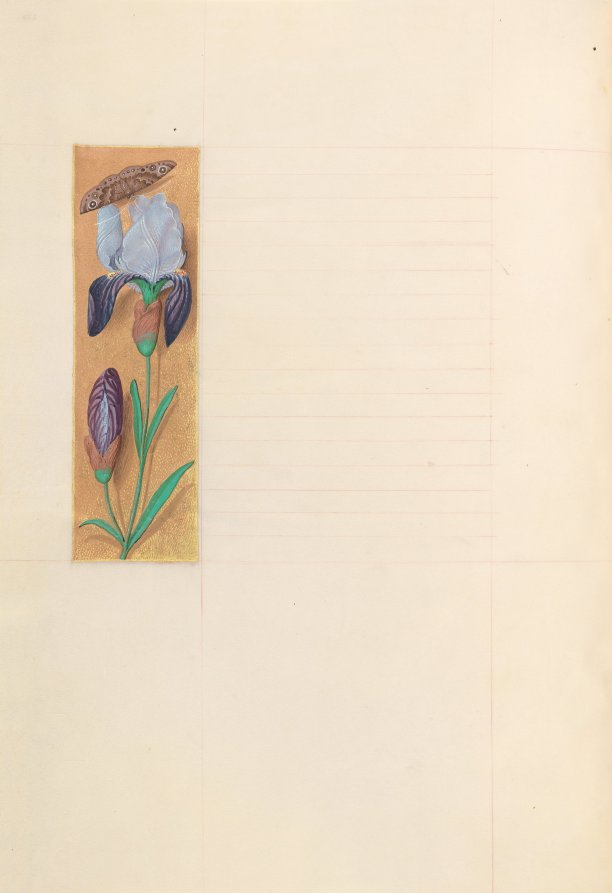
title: Hours of Queen Isabella the Catholic, Queen of Spain: Fol. 277v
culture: Flanders, Ghent and Bruges, late 15th century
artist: Master of the First Prayerbook of Maximillian (Flemish, c. 1444–1519)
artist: and Associates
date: c. 1500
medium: ink, tempera, and gold on vellum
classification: Bound Volume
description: This manuscript was illuminated by a circle of at least five highly organized manuscript painters active in the Flemish cities of Ghent and Bruges. The principal illuminator was Alexander Bening, who painted the majority of the book's miniatures. Manuscripts produced by this circle of artists are renowned for the decoration of their borders, which typically feature a rich variety of realistically-painted flowers, birds, and butterflies. This prayer book, called a book of hours, was intended not for a cleric, but for the private devotions of a lay person-in this case, Isabella the Catholic, Queen of Spain (1451-1504). Isabella's coat of arms embellishes the book's frontispiece. It is unlikely that the book was commissioned by the Queen herself; rather, she probably received it as a diplomatic gift from someone courting her patronage, perhaps Cardinal Francisco Jimenez de Cisneros. A Franciscan friar, Jimenez was dependent upon Isabella for his advancement, first to the post of Queen's confessor in 1492, and then to Archbishop of Toledo in 1495.